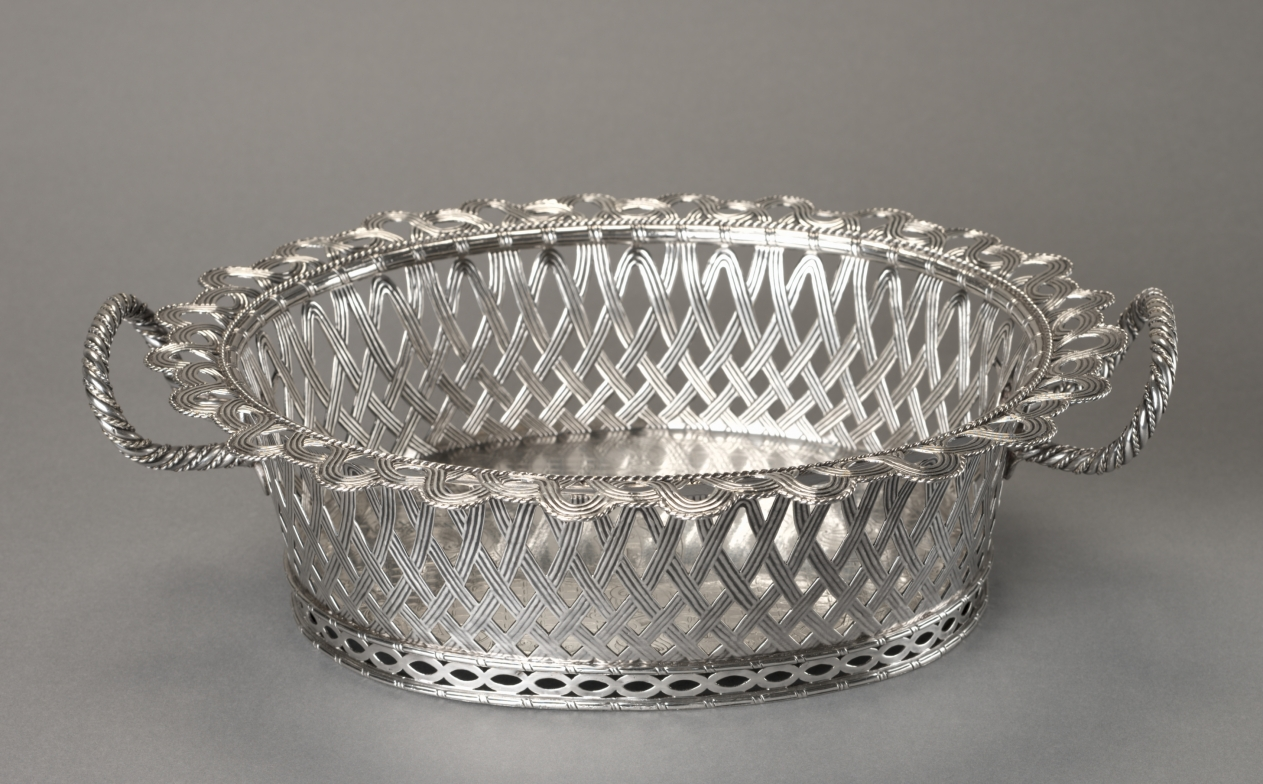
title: Fruit Basket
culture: England, London, 18th century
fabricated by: Paul Jacques de Lamerie (British, 1688–1751)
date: 1729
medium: silver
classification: Silver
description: Silver fulfilled a prominent role in projecting wealth, status, and power in British life during the 1600s and 1700s. During this time, the arrival of silversmiths from continental Europe infused Dutch, French, and German influences within established English taste. For example, this basket was produced by Paul Jacques de Lamerie, who, despite being the preeminent silversmith in Britain during the early 1700s, was born in the Netherlands to minor French nobility. Unlike later designs, this work, with its rope-twisted handles, scalloped edges, and interweaving pattern, still closely resembles the straw baskets that inspired its shape and decoration.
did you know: The presence of handles suggests that this fruit basket was designed to be passed among guests after dinner.